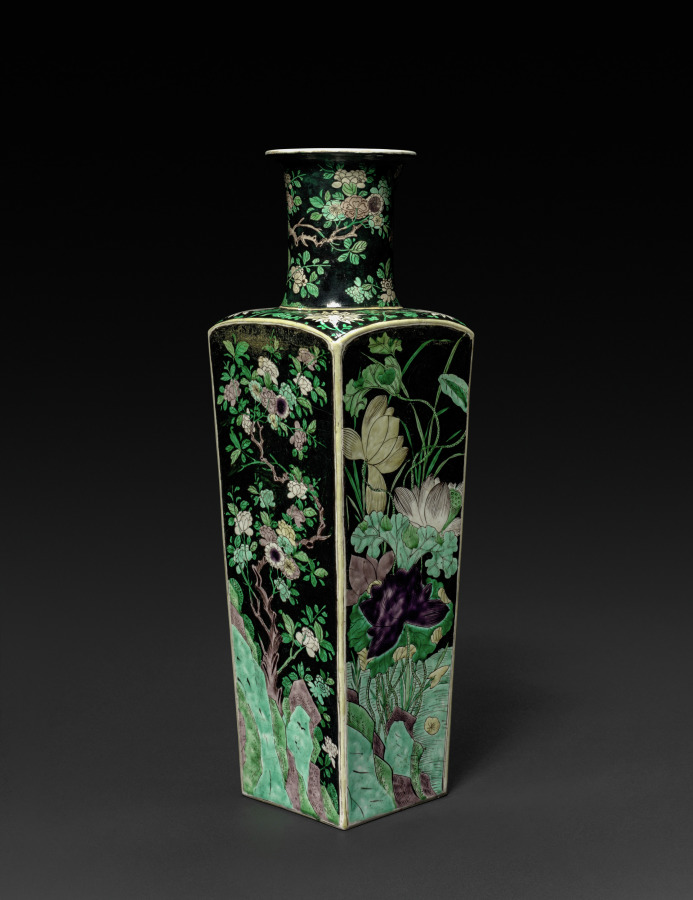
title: Club-shaped Vase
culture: China, Qing dynasty (1644-1911), Kangxi reign (1662-1722)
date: 1662–1722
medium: porcelain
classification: Ceramic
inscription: 大明成...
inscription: [arrow] FRONT/Stand #114